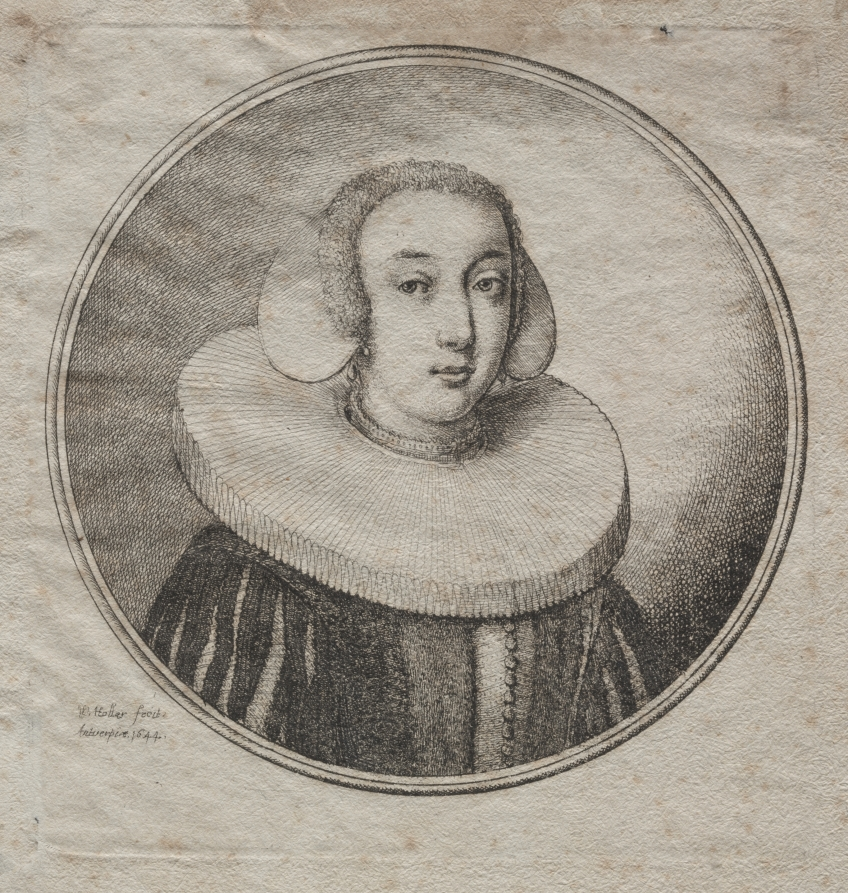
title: Woman with a Millstone Ruff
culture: Bohemia, 17th century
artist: Wenceslaus Hollar (Bohemian, 1607–1677)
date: 1644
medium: etching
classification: Print